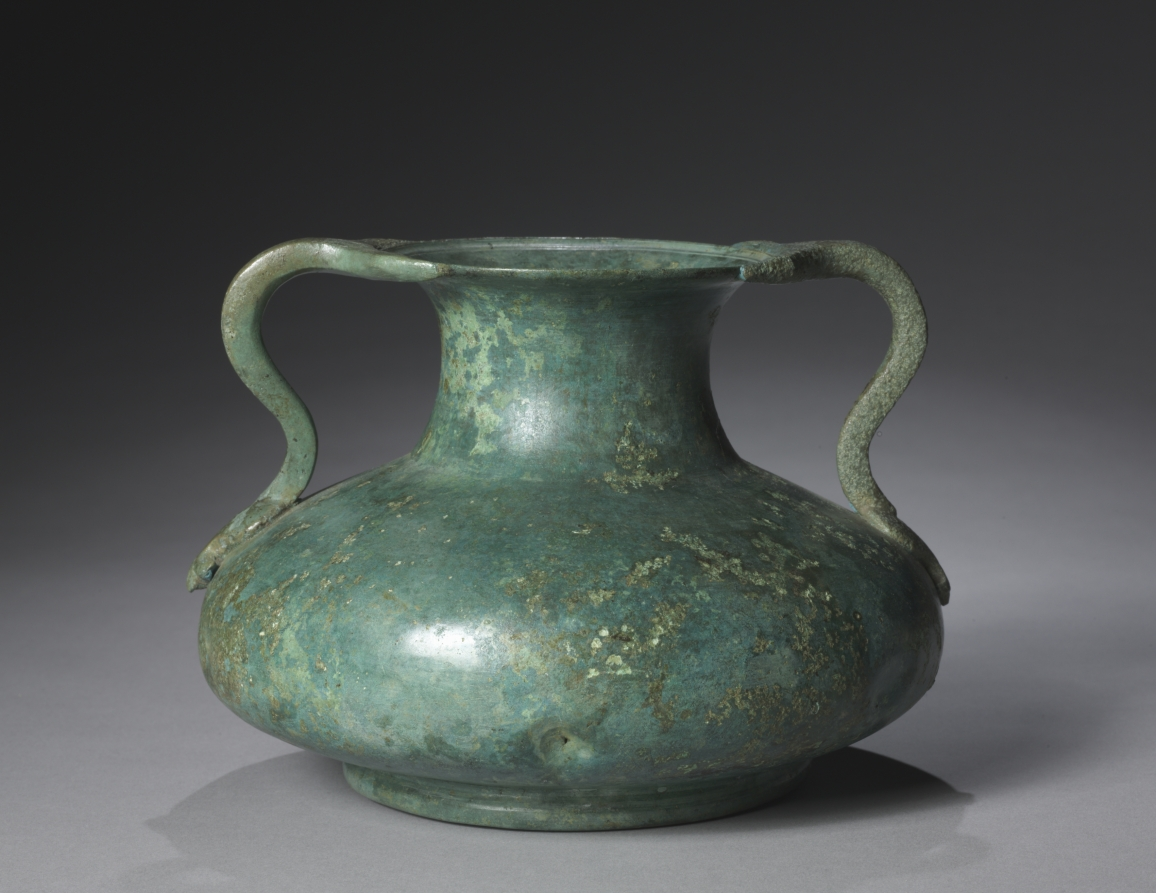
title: Vase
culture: Italy, Roman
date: 200–1 BCE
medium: bronze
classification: Metalwork